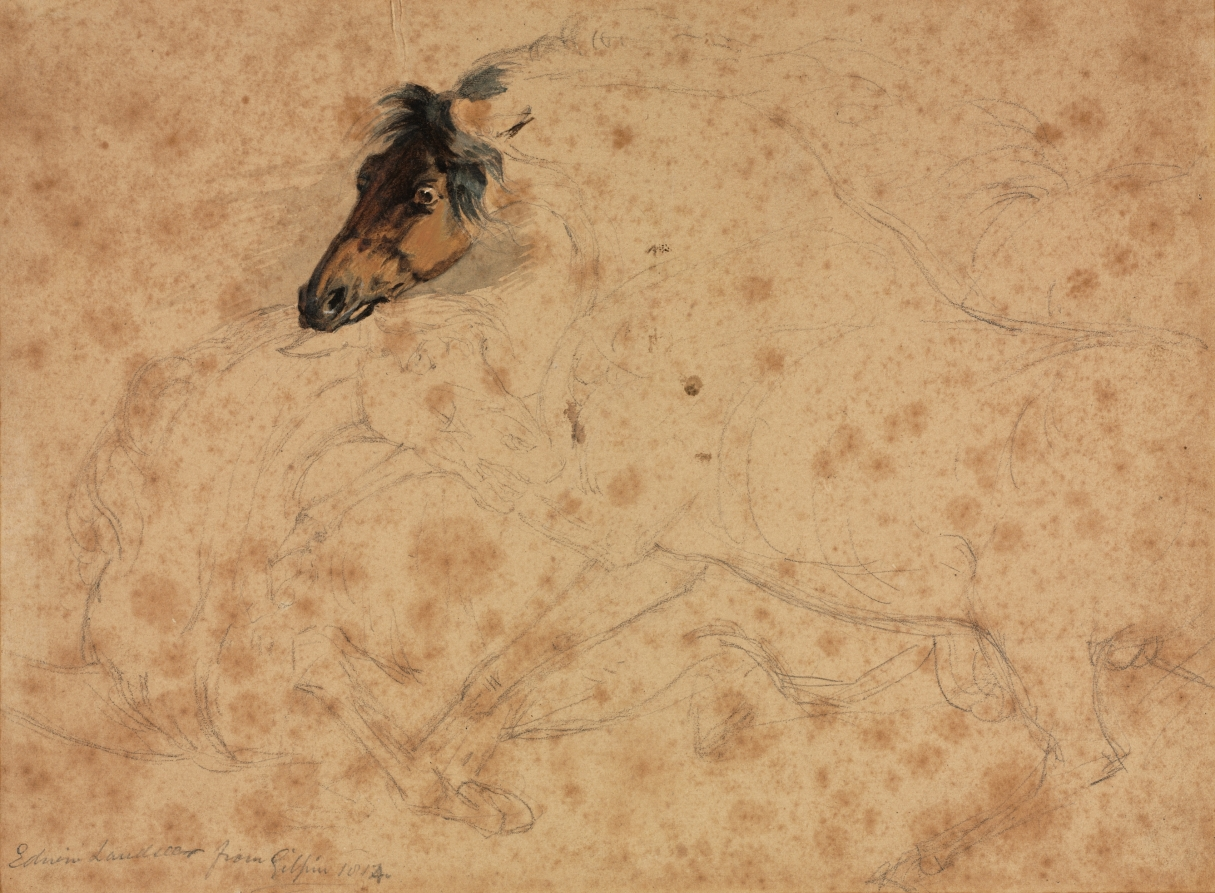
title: Study of Horses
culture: England, 19th century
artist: Edwin Henry Landseer (British, 1802–1873)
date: 1854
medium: graphite with wash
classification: Drawing